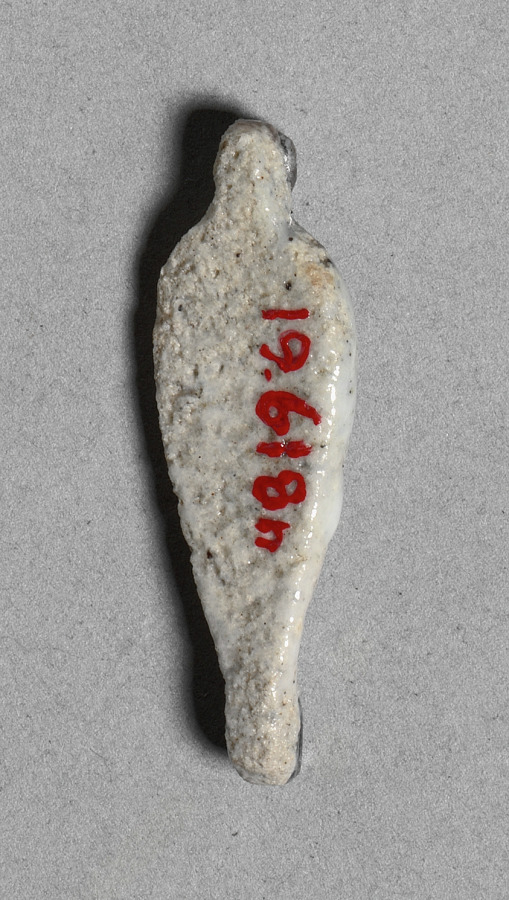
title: Petal-Shaped Bead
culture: Egypt, New Kingdom (1540–1069 BCE), Dynasty 18, reign of Amenhotep III (1390–1352 BCE)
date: c. 1391–1353 BCE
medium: faience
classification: Jewelry